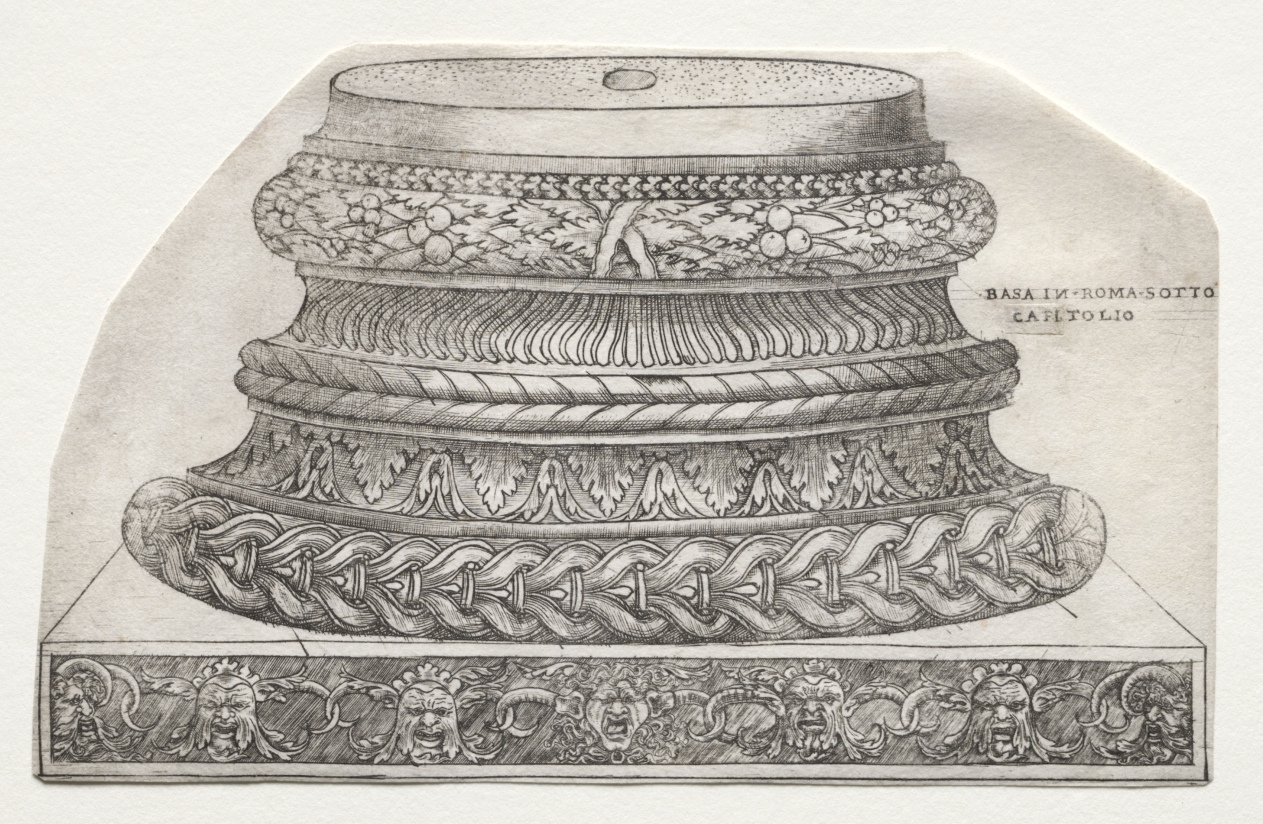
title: Base and Capital with Putti (base)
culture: Italy, 16th century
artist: Master G. A. with the man-trap (Italian, active 1525–50)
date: c. 1525–1550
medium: engraving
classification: Print